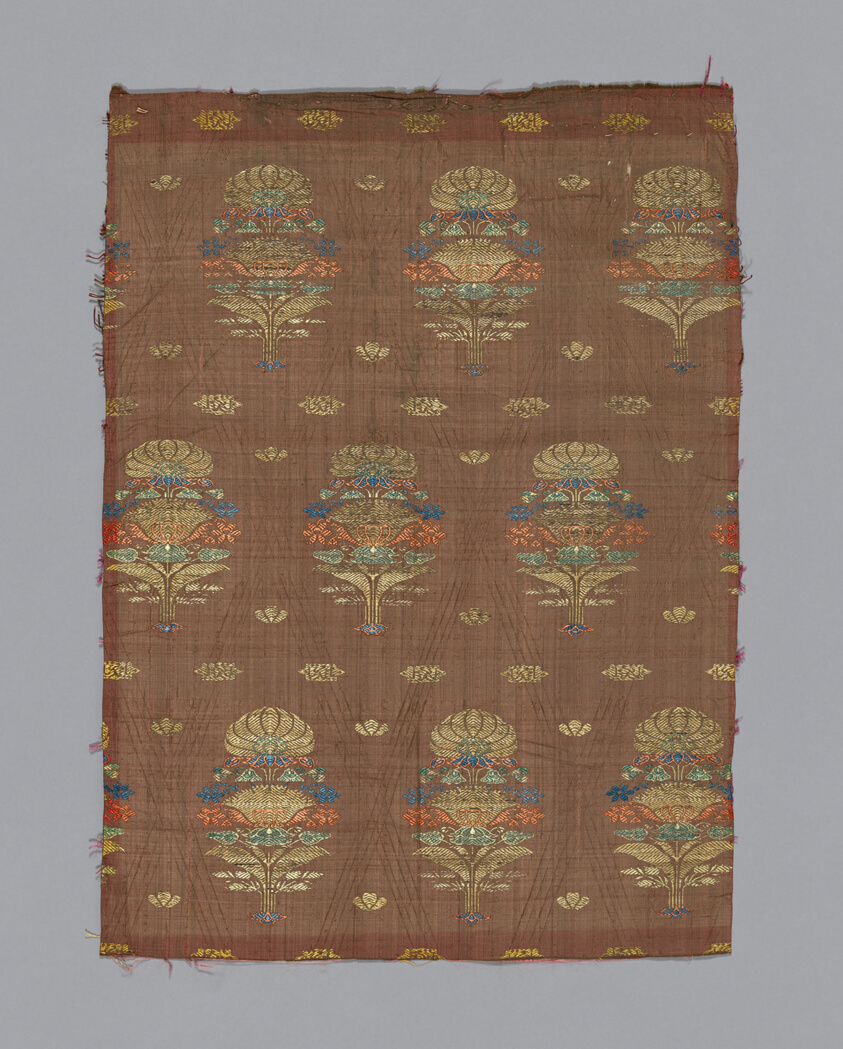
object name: Textile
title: Panel (Possibly from trousers)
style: kashan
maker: Iran (Persia, Kashan)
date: 1675/1725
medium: Silk, brocaded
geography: Iran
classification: textile; weaving